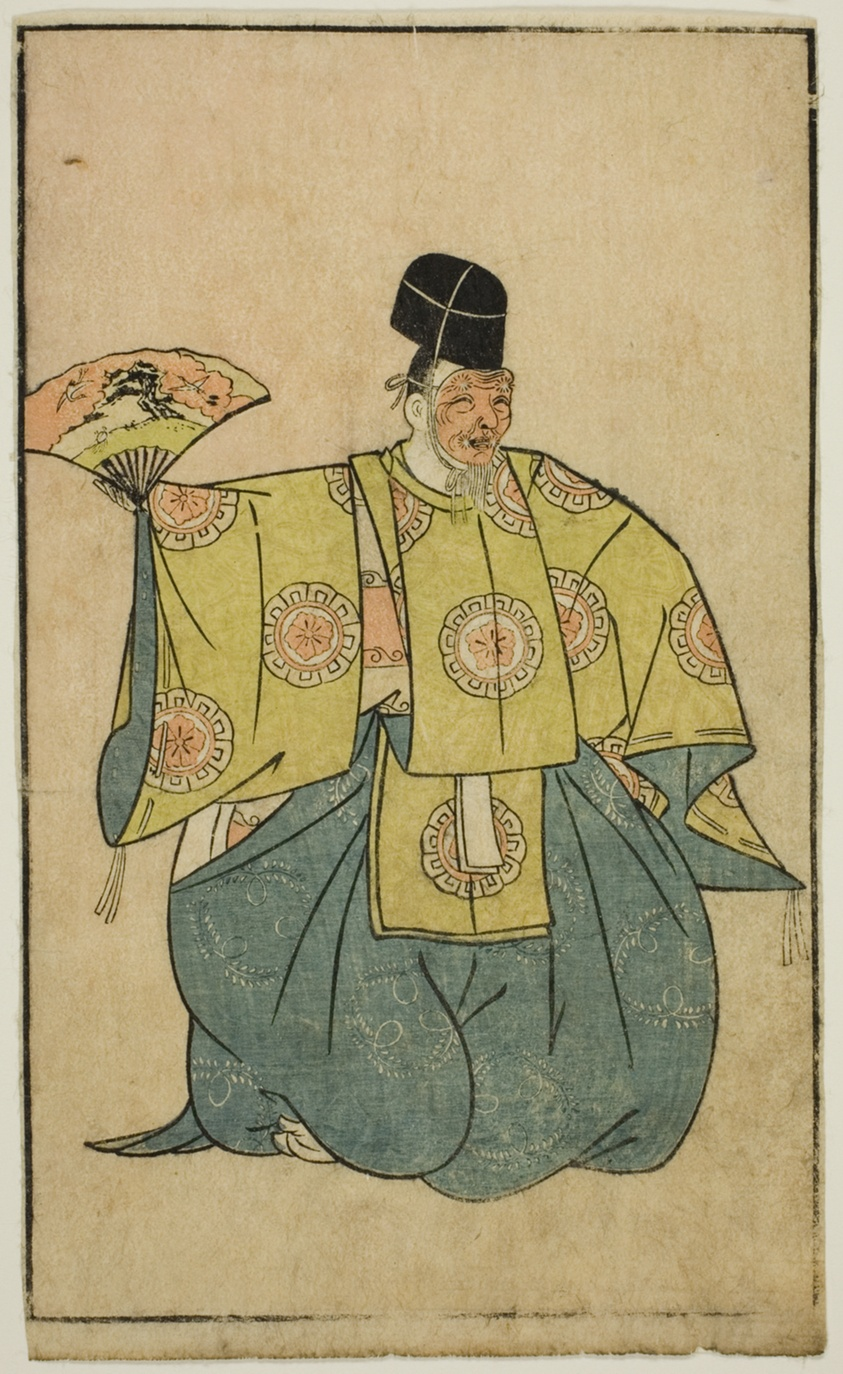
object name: Print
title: An Actor as Okina, from "A Picture Book of Stage Fans (Ehon butai ogi)"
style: Japanese (culture or style)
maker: Katsukawa Shunsho 勝川 春章; Japanese, 1726-1792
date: 1770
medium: Color woodblock print; page from illustrated book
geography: Japan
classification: woodblock print; print; asian art